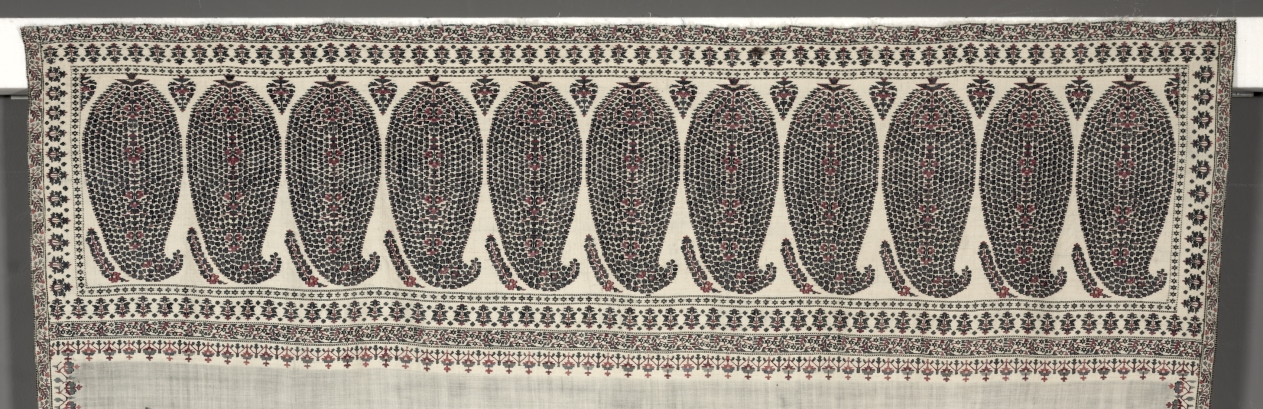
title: Long Shawl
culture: India, Kashmir, 19th century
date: c. 1812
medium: 2/2 twill tapestry weave, double interlocked; wool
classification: Textile